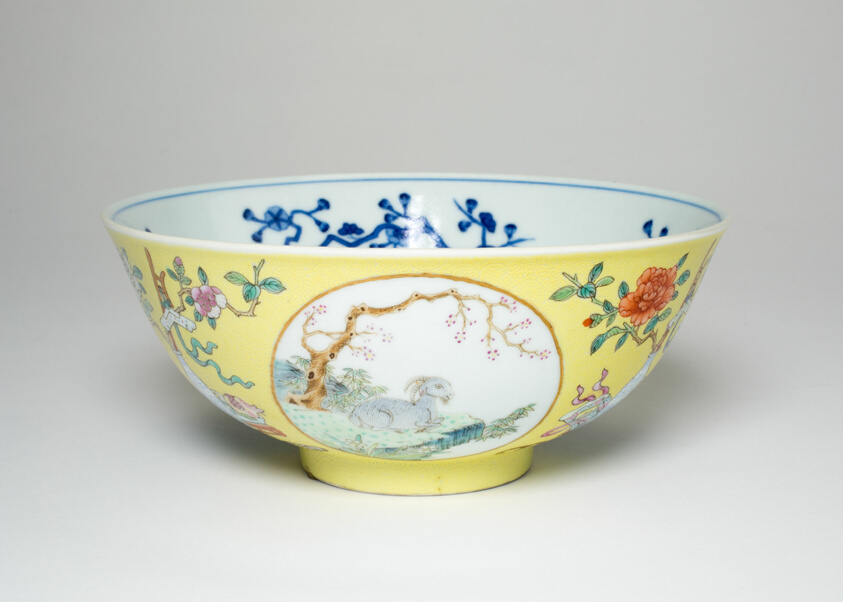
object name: Vessel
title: Bowl with Six Goats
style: Chinese (culture or style)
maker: China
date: Qing dynasty (1644–1911), Daoquang reign mark and period (1821–1850)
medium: Porcelain painted in underglaze blue and overglaze enamels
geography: China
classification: bowl; porcelain; dish (vessel); asian art; ceramics; vessel